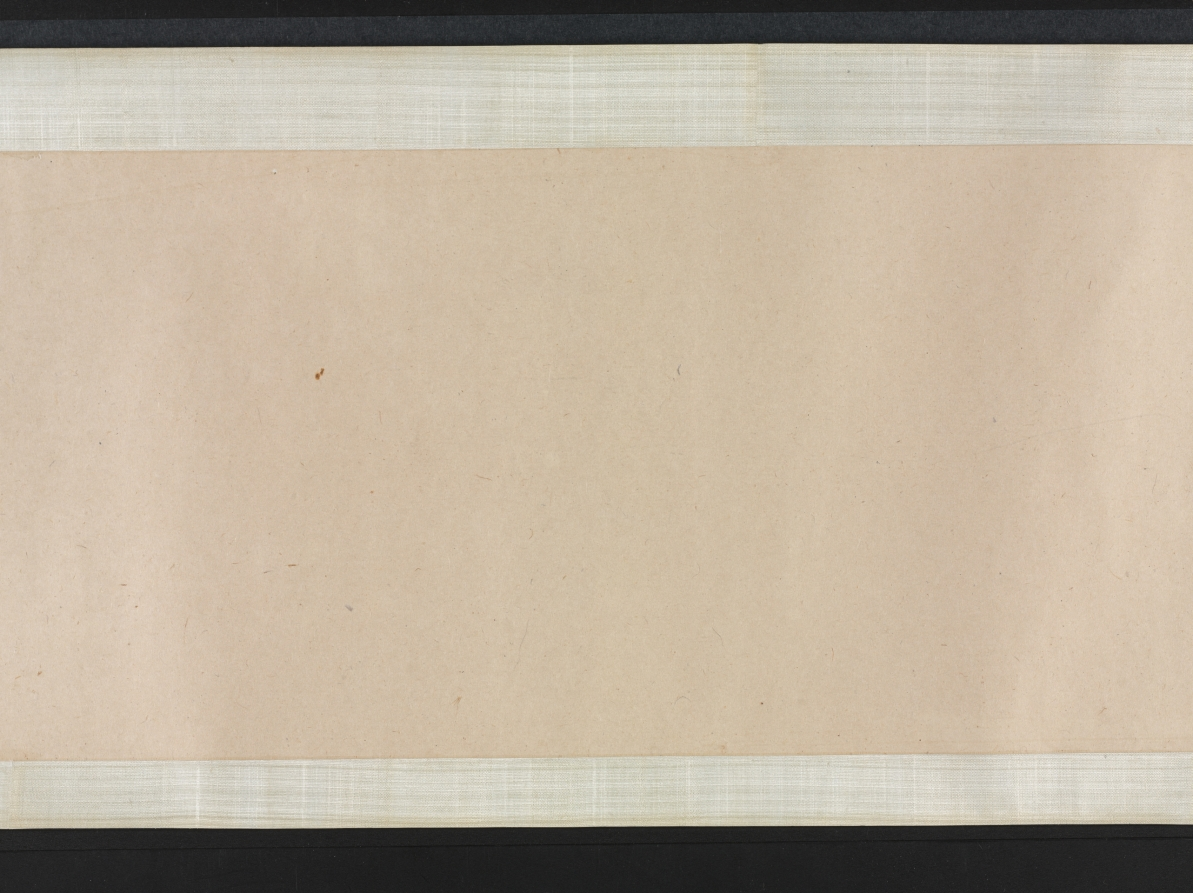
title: Saying Farewell at Xunyang (Song of the Pipa)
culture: China, Ming dynasty (1368–1644)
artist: Wen Boren (Chinese, 1502–1575)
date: 1500s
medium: handscroll, ink and color on paper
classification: Painting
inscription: "潯陽送客圖" 五峰山人文伯仁寫于停雲館中 [印] 文伯仁; 五峰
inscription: 2 colophons and 9 additional seals: 1 transcription of "Pipa xing 琵琶行” (Song of Pipa) and 3 seals of Zhu Yizun 朱彜尊 (1629-1709); 2 seals of Wu Rongguang 吳榮光 (1773-1843); 1 colophon, dated 1826, and 3 seals of Wu Xijia 吳錫嘉 (mid-1700s)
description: This handscroll depicts The Song of the Pipa, a poem by Bai Juyi 白居易 (772–846) written after the poet’s encounter with a pipa player on the Yangzi River. Expelled from her home city when her beauty and fame had faded, she played for the poet at night. Her musical performance and tragic life story resonated with Bai Juyi, who had just been demoted and exiled from life at court himself. The hazy, vast view and pale color tonalities of this painting illustrate these feelings of endless sadness, having lost one’s sense of purpose in life.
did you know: Wen Boren depicted the chilly autumn water with a fishnet pattern.